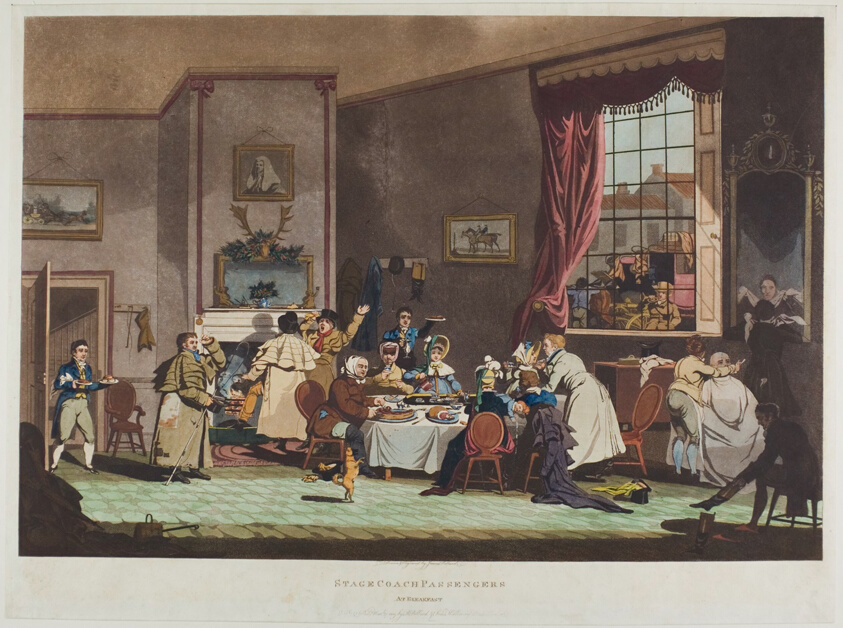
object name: Print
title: Stage Coach Passengers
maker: James Pollard (English, 1797-1867)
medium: Aquatint in black, with hand-coloring, on paper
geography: England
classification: aquatint; print; prints and drawing